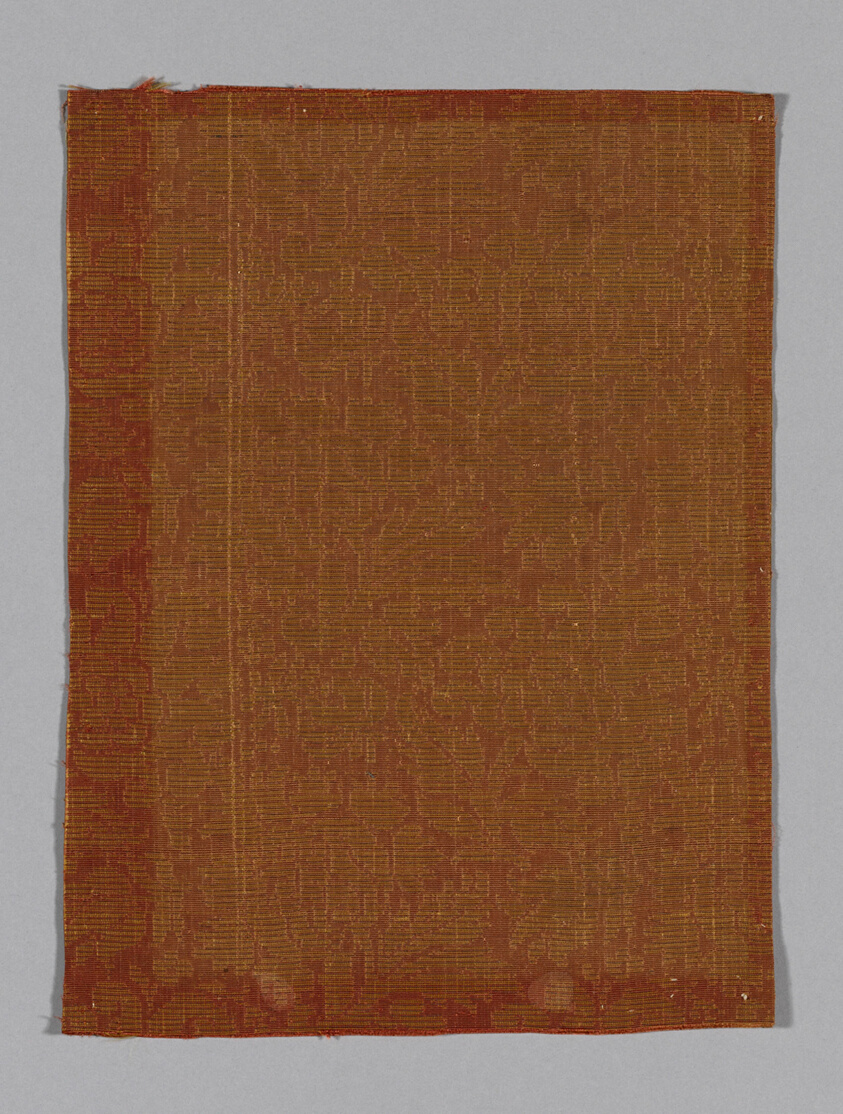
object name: Textile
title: Fragment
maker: Italy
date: 1650/1700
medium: Plain compound cloth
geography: Italy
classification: textile; weaving